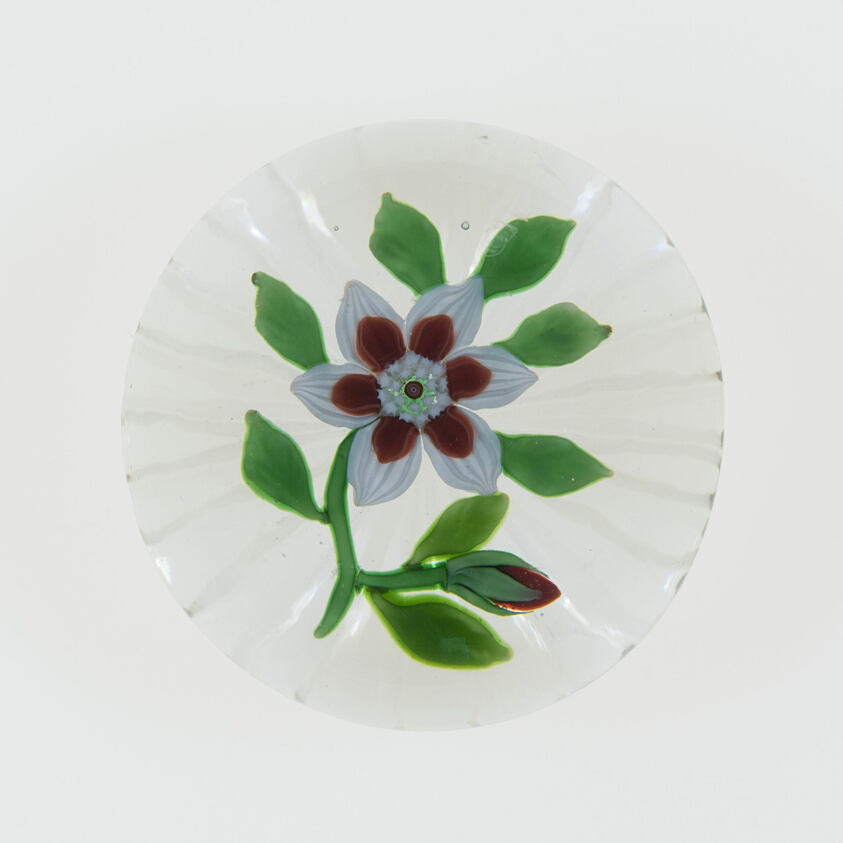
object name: Glass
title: Paperweight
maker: Baccarat Glassworks (Cristalleries de Baccarat); Lorraine, France, founded 1764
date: c. 1845–60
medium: Glass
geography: Baccarat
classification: paperweight; glass